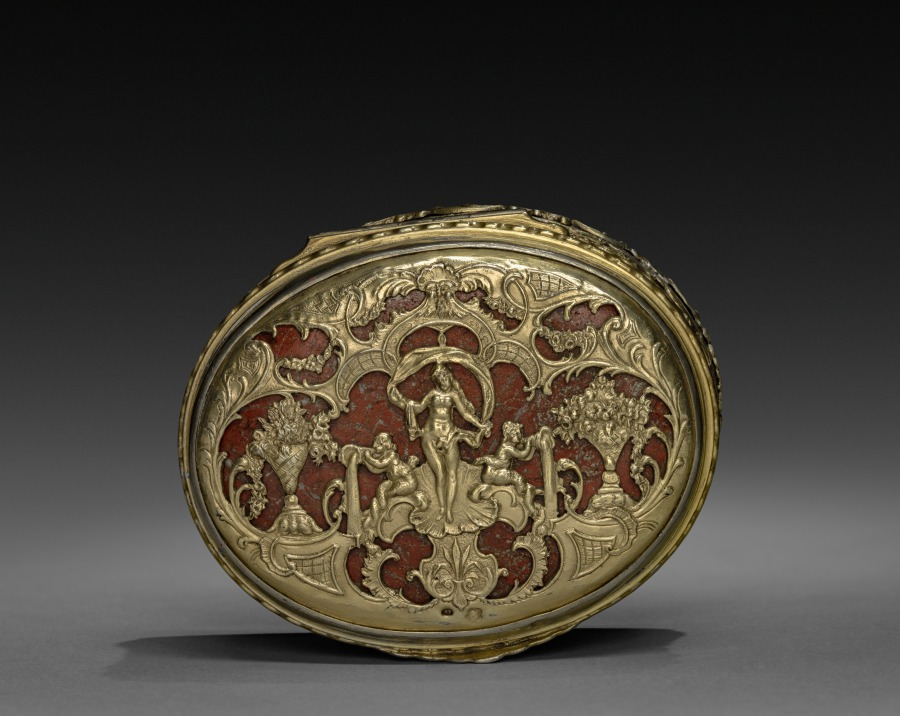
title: Box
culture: Austria, Vienna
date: late 1800s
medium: silver gilt and hardstone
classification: Metalwork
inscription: "3A"; head of Diana, Vienna marks in use since 1872. Maker's mark in an oval punch, first letter "B," second difficult to read, perhaps "P," mark for Bruder Pollak (Neuwirth, p. 116).